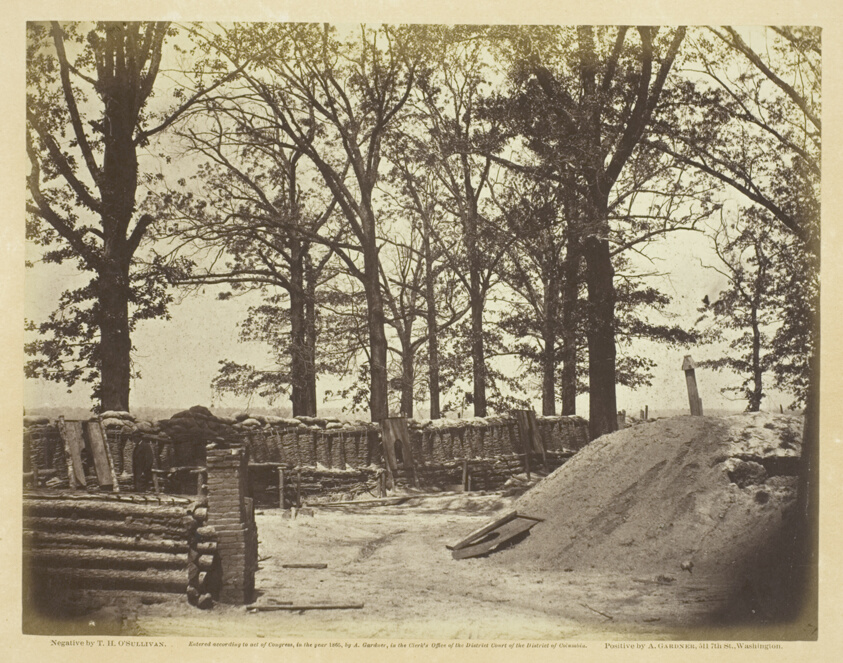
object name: Photograph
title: View of the Interior of Fort Steadman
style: 19th century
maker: Timothy O'Sullivan (American, born Ireland, 1840–1882)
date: May 1865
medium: Albumen print, pl. 84 from the album "Gardner's Photographic Sketch Book of the War, Volume II" (1866)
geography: United States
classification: photograph; albumen silver print; photography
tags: Collected by Hugh Edwards, Gardner's Photographic Sketch Book